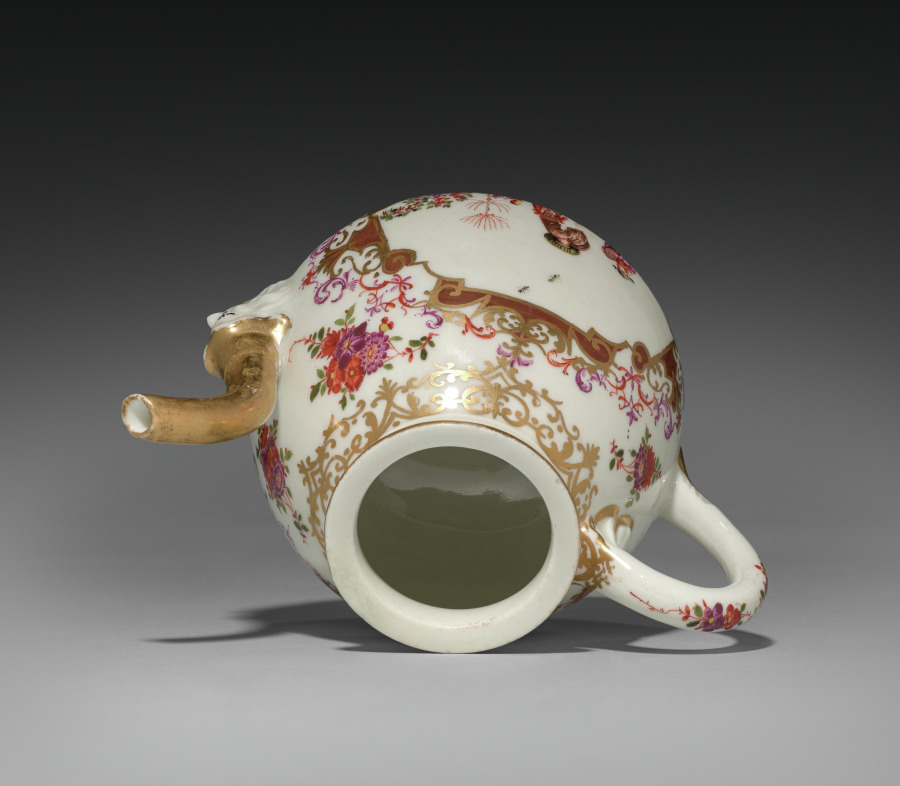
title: Tea Pot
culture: Germany, Meissen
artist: Meissen Porcelain Factory (German, est. c. 1710)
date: c. 1723–24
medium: gilt porcelain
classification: Ceramic